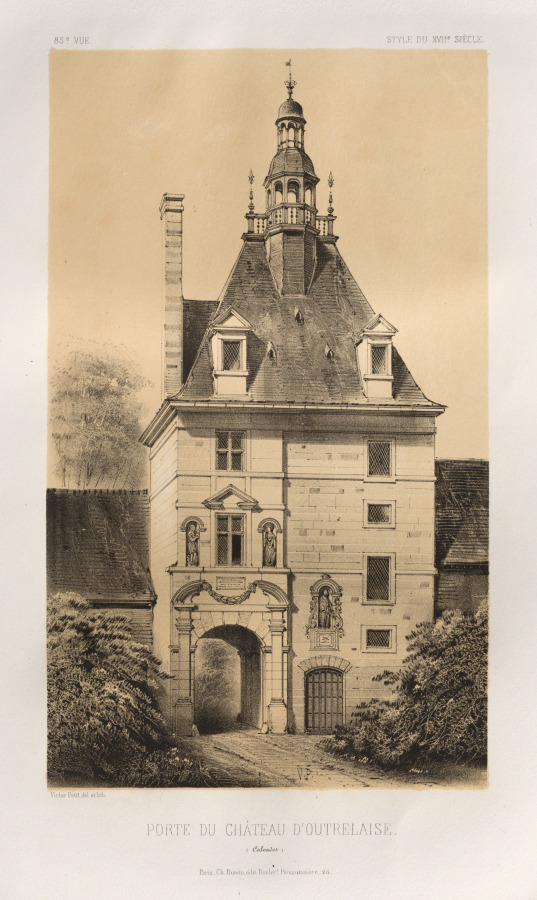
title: Architecture Pittoresque ou Monuments des XVeme. Et XVIeme. Siecles: Chateaux de France des XV et XVI Siecles: Pl. 85, Porte du Château d'Outrelaise (Calvados)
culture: France, 19th century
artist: Victor Petit (French, 1817–1874)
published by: Charles Boivin (publisher and editor); Lith de Godard a Paris (printer)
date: 1860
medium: lithograph with tint stone, from portfolio of 100 lithographs with tint stone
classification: Print